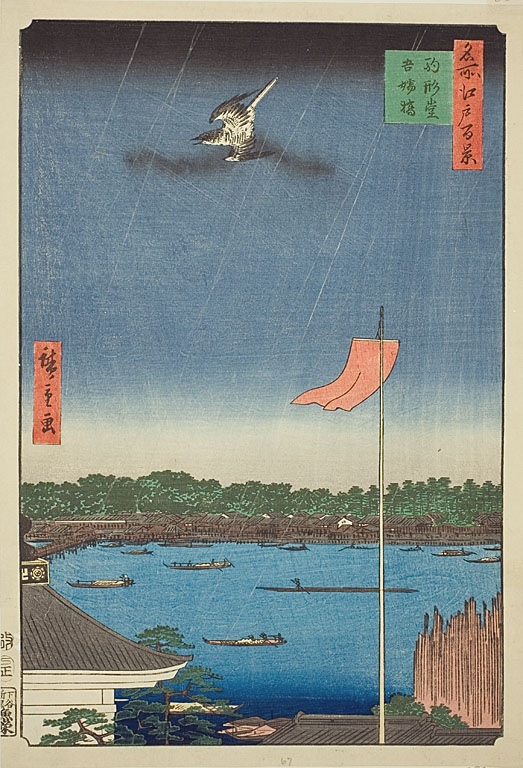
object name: Print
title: Komagata Hall and Azuma Bridge (Komagatado Azumabashi), No.62 from the series "One Hundred Famous Views of Edo (Meisho Edo hyakkei)"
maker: Utagawa Hiroshige (Japanese, 1797-1858)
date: 1857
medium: Color woodblock print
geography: Japan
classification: woodblock print; print; asian art